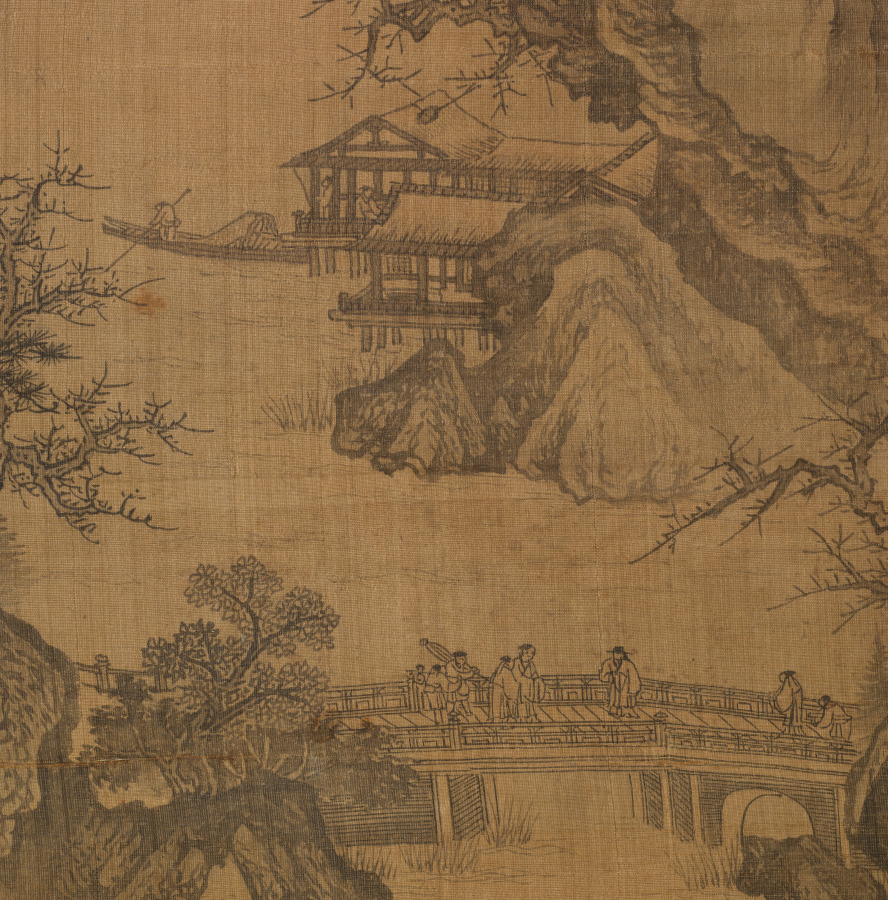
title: Mountain Market, Clear with Rising Mist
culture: Korea, Joseon dynasty (1392–1910)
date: early 1500s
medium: Hanging scroll; ink on silk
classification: Painting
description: This painting depicts several vignettes of the scholar-hermit’s various activities. In the lower left corner, the scholar-hermit is portrayed welcoming his guest in the courtyard. In the middle section on the lower bottom, the scholar and his guest are shown encountering another traveler on the bridge and exchanging their greetings. After crossing the bridge, the scholar visits a friend who lives in a compound of multiple buildings. The two friends decide to take a short walk. Both appear in a terraced cliff, enjoying a mountain vista and the fragrance of an old pine tree carried by the gentle wind. The scholar continues his journey with his two servants. They are portrayed crossing a winding wooden bridge. Right beyond the colossal rocky mountain, a panoramic view to a bustling market place unfolds, suggesting that it may be the place where the scholar-hermit’s entourage would visit. Perhaps the scholar need to buy items such as books, rolls of papers, and brushes, all essential to scholarly life. Toward the upper left corner, another group of travelers is landing on the river bank that leads to the city gate; they may be headed to the multistoried Buddhist stupa nestled on the top of the mountains.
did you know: Due to its stylistic features, this painting has long been believed to be a Chinese painting of the Northern Song period, dated to the 12th century.